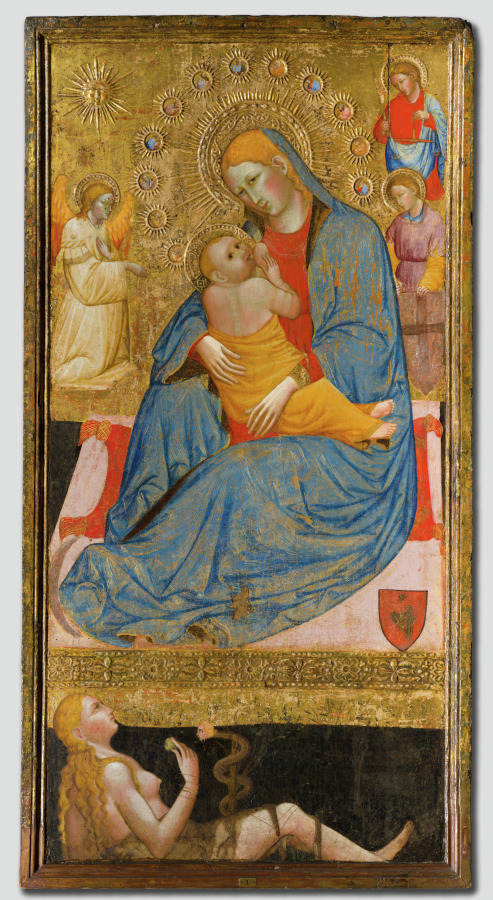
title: The Madonna of Humility with the Temptation of Eve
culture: Italy, the Marches, late 14th-early 15th Century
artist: Olivuccio di Ciccarello (Italian, Marche, 1360/65–1439)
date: c. 1400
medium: tempera and gold on wood panel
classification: Painting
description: The Madonna is seated humbly on the ground nursing her child. Saint George and the Archangels Gabriel and Michael kneel nearby, while Christ’s disciples appear radiating from the Madonna’s halo in the form of stars. In contrast with the Virgin’s purity, Eve lies in the lower part of the painting. Coaxed by the serpent, she raises the forbidden fruit to her mouth, thus condemning humankind through her original sin. The juxtaposition of these two images affirms the Incarnation and the role of Christ and the Virgin in the redemption story. The deep scratches on the surface of the panel, especially on the serpent’s face and Eve’s wrist, likely resulted from a zealous Christian’s symbolic attack on the power of evil. The artist, Olivuccio di Ciccarello, is known to have been active in the Marche in central Italy. Little is known of his life except that he was an important and prolific painter in Ancona, where he died. His paintings were formerly attributed to Carlo da Camerino, an apparently nonexistent artist, on the basis of a mistaken reading of his signature on a crucifix.